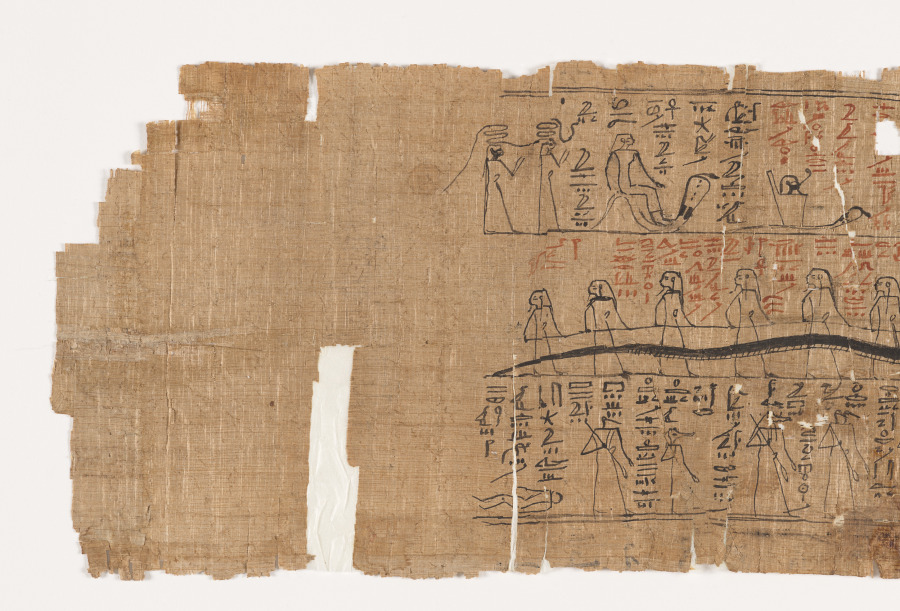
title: Book of Amduat, Perhaps of Bakenmut, with Elements of the Tenth through Twelfth Hours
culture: Egypt, Third Intermediate (1069–715 BCE), Dynasties 21–22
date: 1000–900 BCE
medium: papyrus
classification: Funerary Equipment